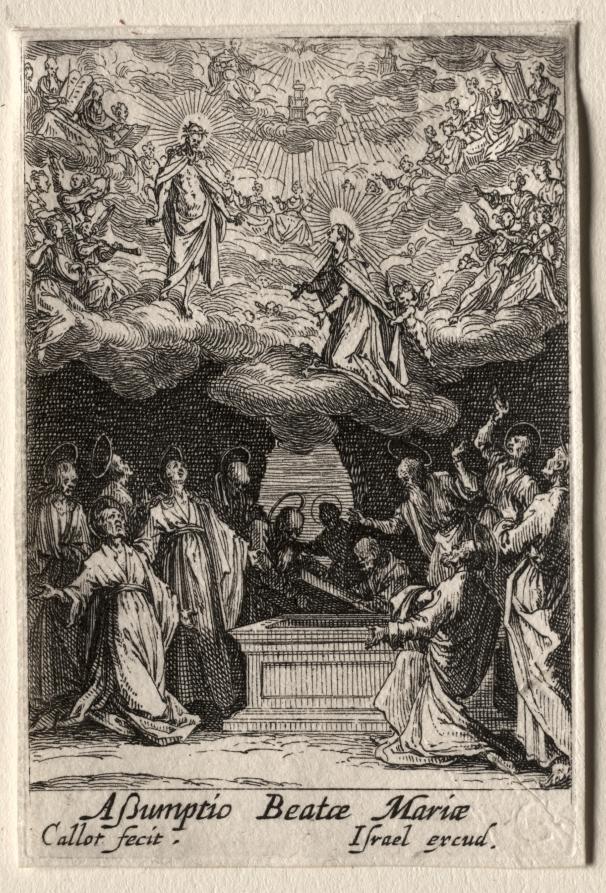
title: The Life of the Virgin: The Assumption of the Virgin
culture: France, 17th century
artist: Jacques Callot (French, 1592–1635)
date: ca. 1633–34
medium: etching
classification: Print